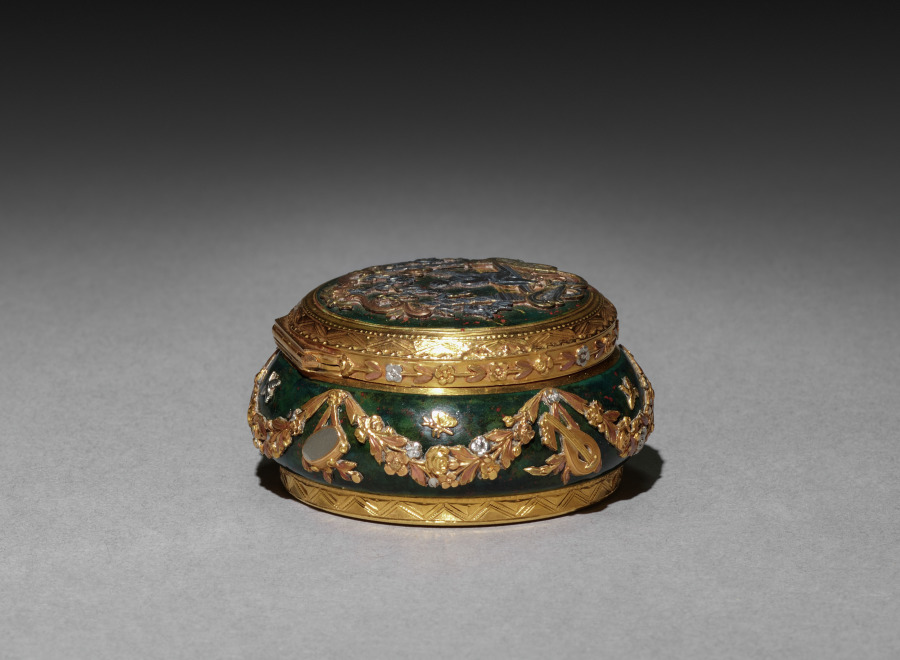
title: Bonbonniere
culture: France, 19th century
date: 1850–1899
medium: bloodstone (?) mounted in colored golds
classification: Miscellaneous